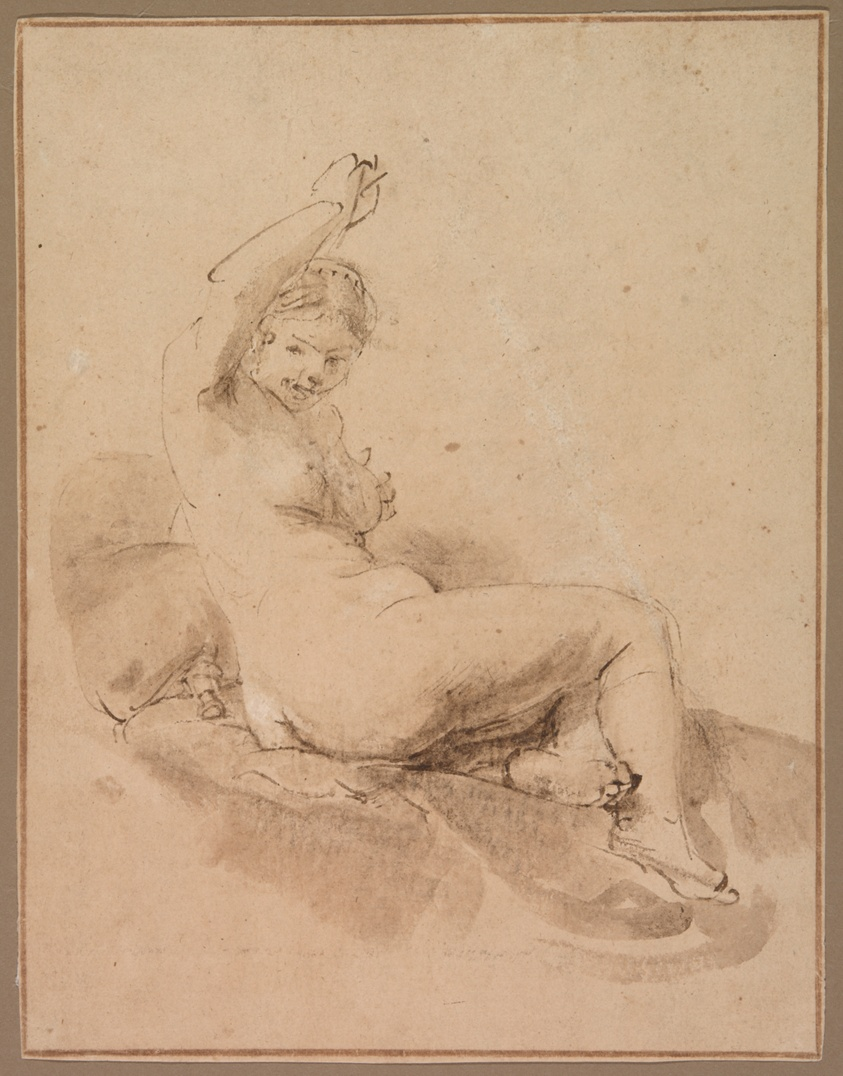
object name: Drawing and Watercolor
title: Female Nude Reclining with Arm Raised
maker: Attributed to Aert de Gelder; Dutch, 1645-1727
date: c. 1665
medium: Pen and brown ink and brush and brown wash on tan laid paper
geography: Netherlands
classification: pen and ink drawings; drawings (visual works); prints and drawing